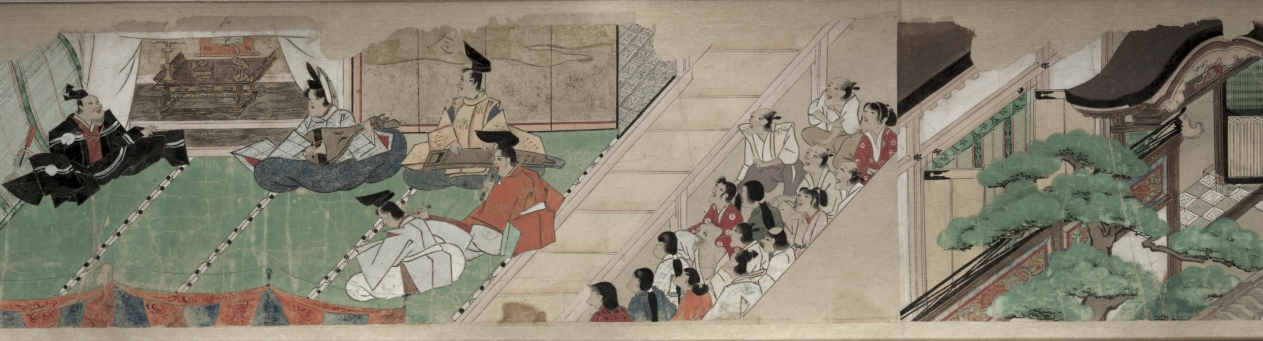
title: The Saltmaker's Story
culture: Japan, Edo period (1615–1868)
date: early 1600s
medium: One of a pair of handscrolls; ink, color, and gold on paper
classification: Painting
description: Once read and copied by girls at New Year’s celebrations and included in dowries, The Saltmaker’s Story is a rags-to-riches tale in which daughters are gifts from the gods. Despite his simple outlook, the main character progresses from humble roots as an associate at Kashima Shrine to the elite status of grandfather of the emperor through the intervention of the Kashima deity. The Saltmaker’s Story is traditionally presented in a set of three scrolls, but the text of this set has been removed by a previous owner, who remounted the illustrations as a pair. The paintings of this one take us from right to left through the second half of the tale.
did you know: This handscroll originally had texts before its paintings, but the texts were removed.